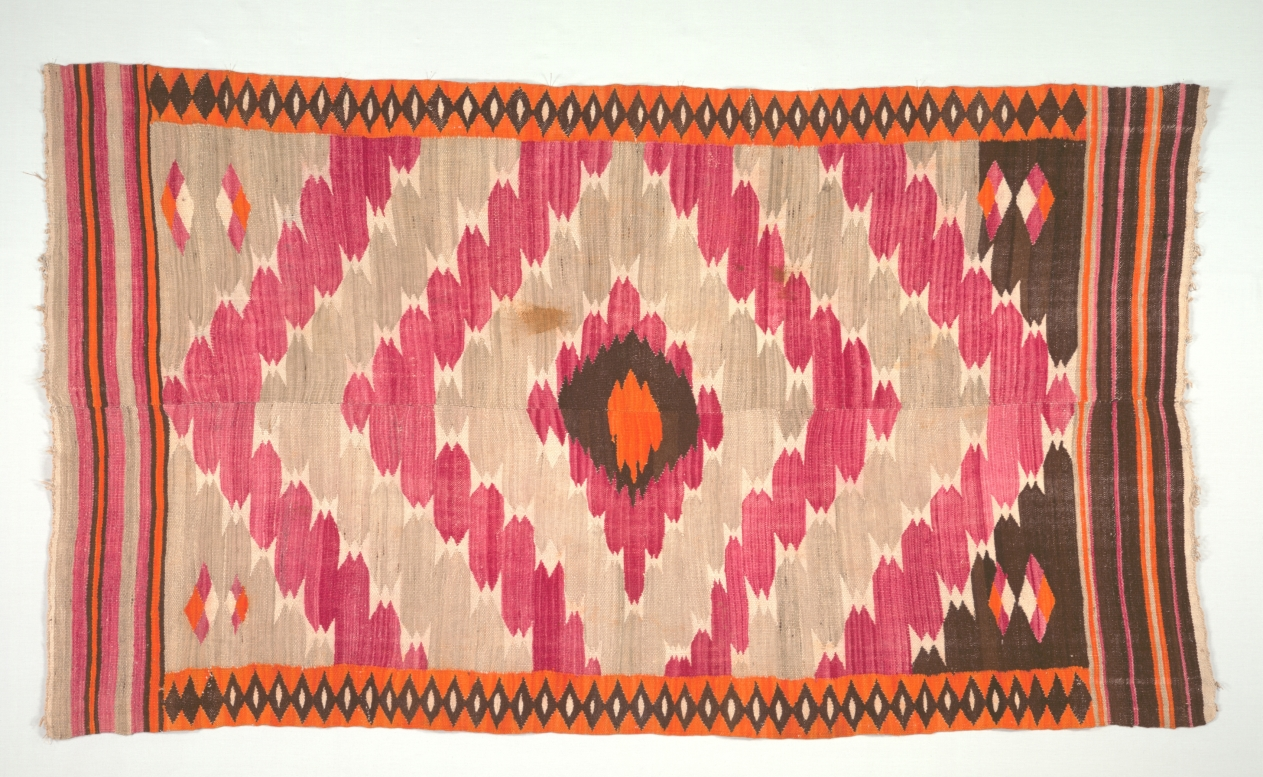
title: Blanket/ Sarape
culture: America, Native North American, Southwest, Rio Grande Hispanic, Post-Contact, Transitional Period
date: c. 1890–1900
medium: tapestry weave: cotton and wool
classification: Textile